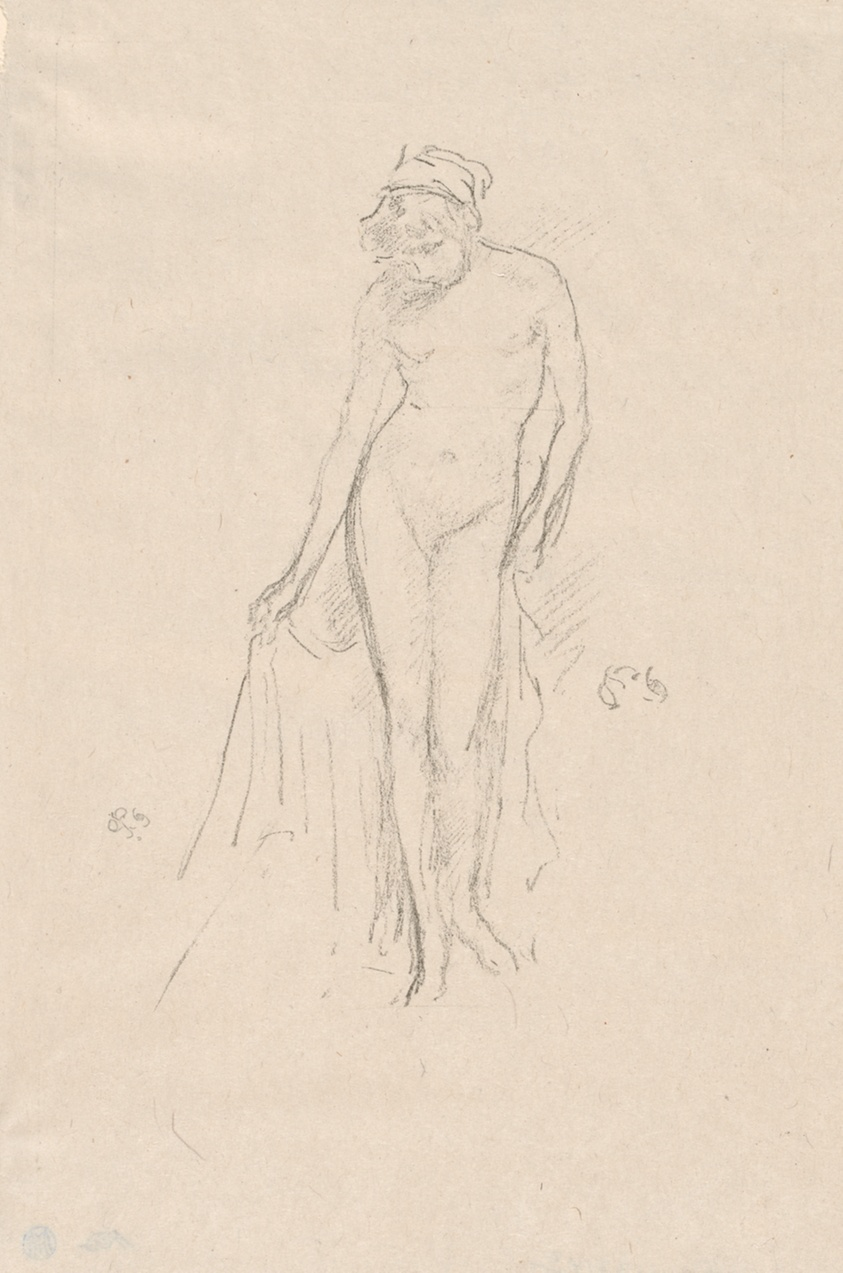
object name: Print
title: Nude Model, Standing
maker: James McNeill Whistler (American, 1834-1903)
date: probably 1891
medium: Transfer lithograph in black on grayish ivory China paper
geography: United States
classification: transfer lithograph; lithograph; print; prints and drawing; paper